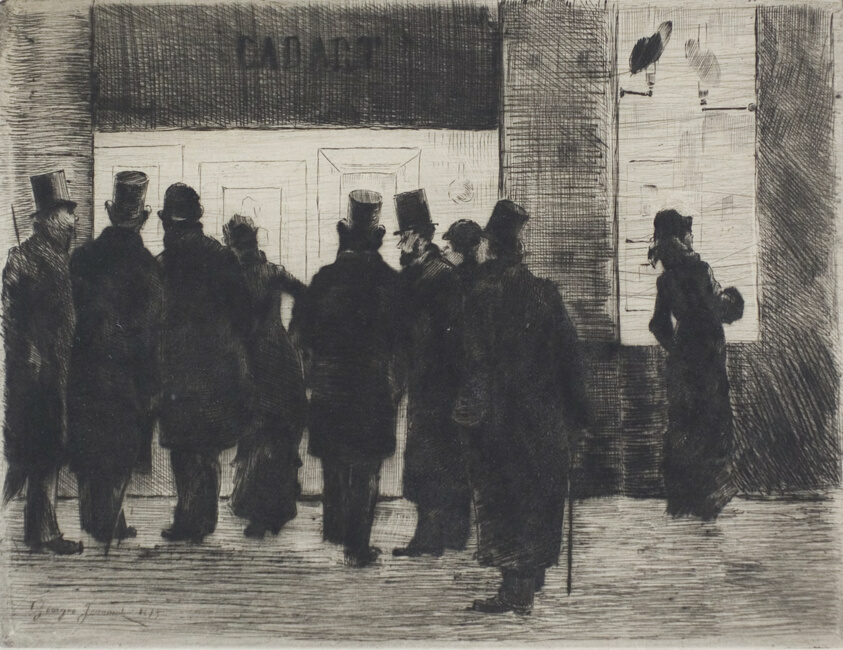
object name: Print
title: Cadart's Shop Window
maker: Pierre-Georges Jeanniot (French, 1848-1934)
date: 1879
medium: Etching ond drypoint on dark cream laid paper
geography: France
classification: etching; print; prints and drawing